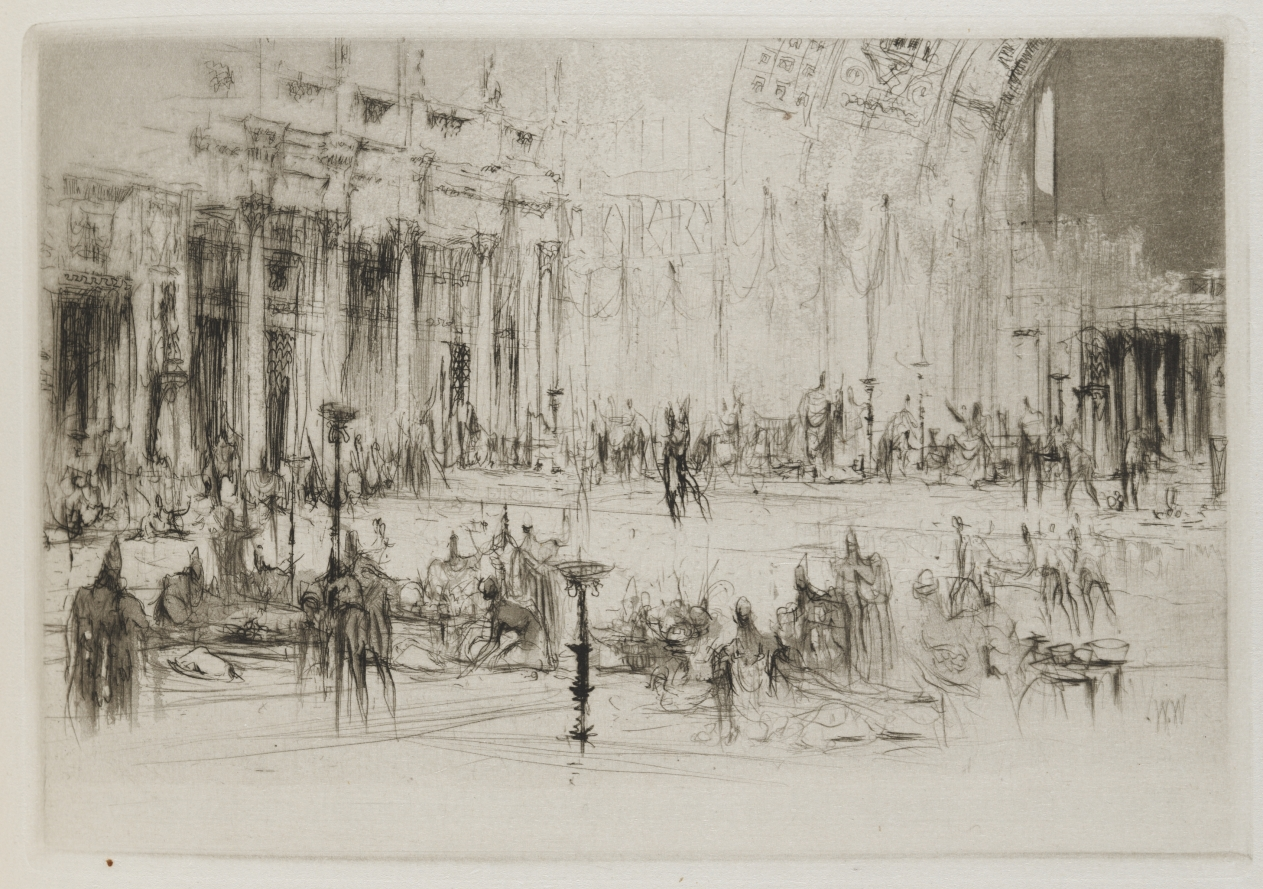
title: Herodias: Page 39, The guests filled the banquet hall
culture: England, 20th century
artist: William Walcot (British, 1874–1943)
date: 1928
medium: etching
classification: Print